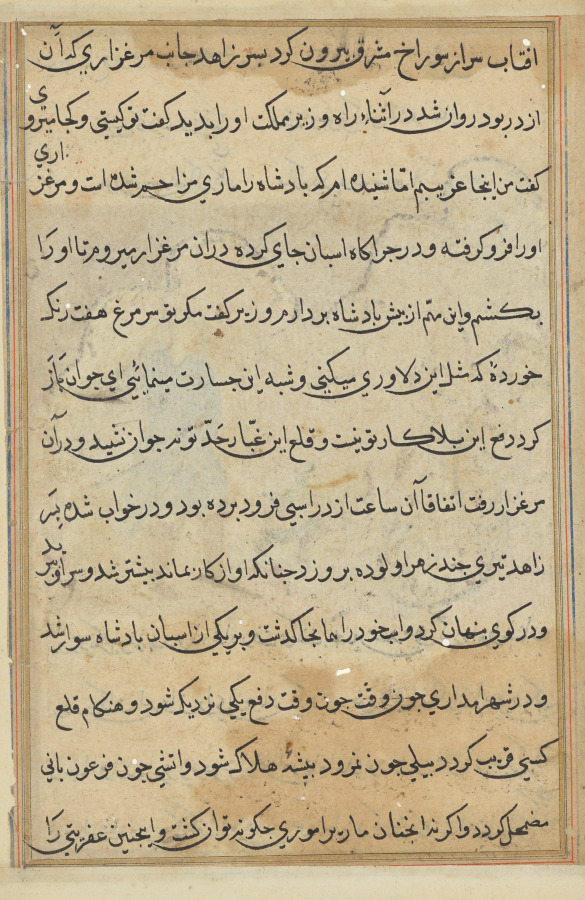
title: Page from Tales of a Parrot (Tuti-nama): text page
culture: Mughal India, court of Akbar (reigned 1556–1605)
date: c. 1560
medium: gum tempera, ink, and gold on paper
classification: Painting